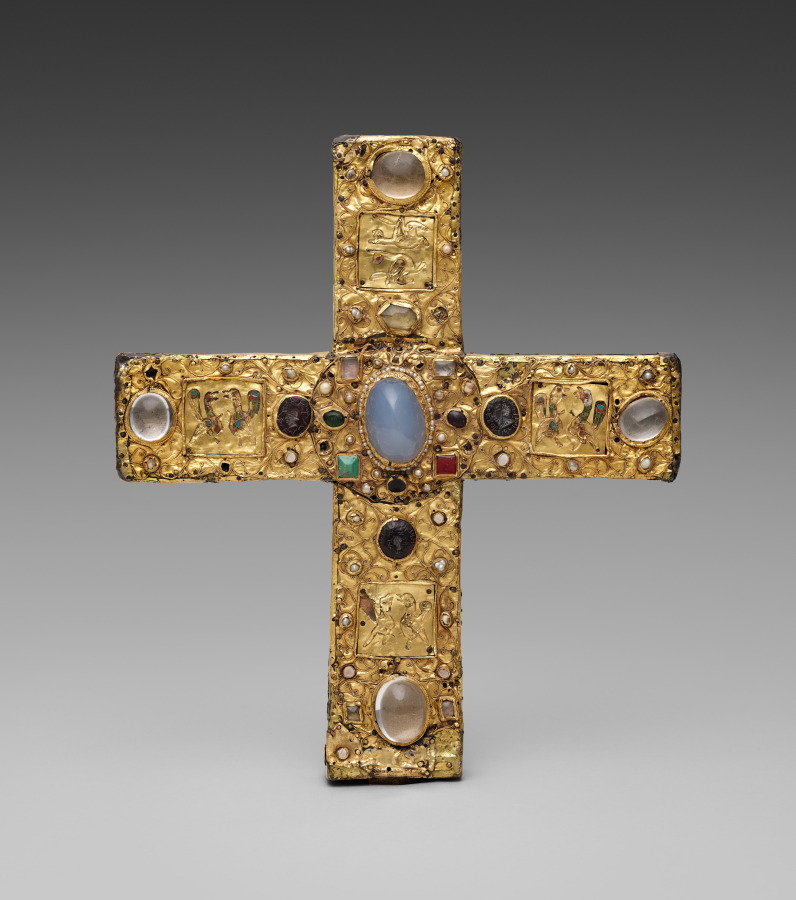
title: Ceremonial Cross of Count Liudolf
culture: Germany, Lower Saxony?, Romanesque period, 11th century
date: shortly after 1038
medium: gold: worked in repoussé; cloisonné enamel; intaglio gems; pearls; wood core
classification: Metalwork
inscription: translation of the inscription on back: Relics of the Holy Bishop Valerius, of the Holy Martyr Pancratius, of the Stone which was laid on the tomb of the Lord. This Gertrude had made for the spiritual welfare of Count Liudolf.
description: This precious gold cross was commissioned by Countess Gertrude (died 1077) and given to the church of Saint Blaise following the death of her husband, Count Liudolf of Brunswick (died 1038). The cross is decorated with a large oval-shaped chalcedony at its center and with slightly smaller rock crystals at its terminal ends. Fine but fragmentary cloisonné enamel plaques with pairs of confronting peacocks, symbols of immortality, appear at the center of each cross arms. They are set within an intricate system of filigree wire decoration imitating tendrils. Numerous pearls, three large intaglio gems, and various precious and semiprecious stones complete the decoration of the cross. Concealed behind the enamel plaque on the upper cross arm are relics of Saints Valerius and Pancratius as well as a fragment from the stone that sealed the Sepulcher of the Lord. The back of this cross is very worn, making it difficult to recognize the main features of its repoussé decoration. Faintly visible at the center is the Lamb of God, a symbol of Christ, with a cross-shaped halo. Depicted at the end of the cross arms are the symbols of the four Evangelists. A Latin inscription above the Lamb of God identifies the relics concealed behind it, namely "relics of the saintly bishop Valerius, of Pancratius martyr, [and] of the stone that was placed above the tomb of the Lord." A second inscription below states, "This [work] was commissioned by Gertrude for the soul of Count Liudolf," revealing the identity of the cross's patron and the approximate date of its commission.